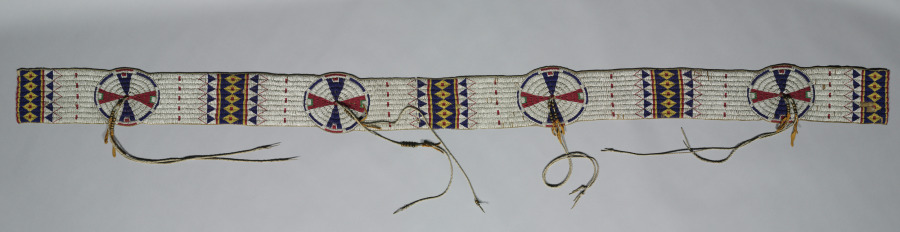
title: Blanket Strip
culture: Native North America, Plains, Tsitsistas (Cheyenne)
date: c. 1900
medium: Native-tanned hide, glass beads, yellow trade cloth, brass beads, sinew thread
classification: Leather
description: The animal-hide robes basic to Plains attire were often ornamented with quilled or beaded strips, which also were stitched to the blankets that replaced robes. This beaded example carries the cross-in-a-circle motif that symbolizes the world, the four directions, and the sacred center, concepts central to Plains worldviews. In the 1932 words of Black Elk, the Oglala Lakota (Sioux) holy man, “[T]he power of the world always works in circles. . . . The flowering tree was at the center of the hoop, and the circle of the four quarters nourished it. . . . Everything the power of the world does is done in a circle.”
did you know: This beaded strip was stitched to a hide or a blanket.